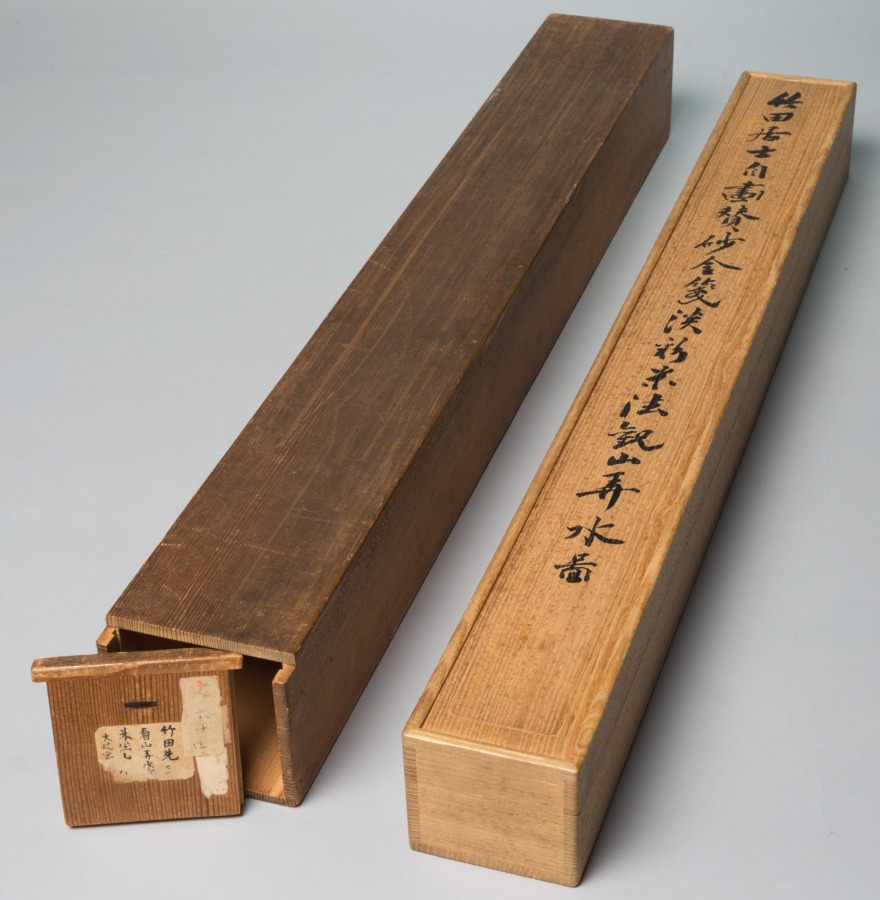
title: Mountain View and Blue Water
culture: Japan, Edo period (1615–1868)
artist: Tanomura Chikuden (Japanese, 1777–1835)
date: early 1800s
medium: hanging scroll; ink, color, and gold on paper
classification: Painting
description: Tanomura Chikuden was an eminent painter whose adopted son, Tanomura Chokunyū (1814–1907), was Seifū Yohei III’s painting teacher. This work was displayed at a gathering commemorating the 10th anniversary of Chokunyū’s death, something we know only because its custom-made box and archival documents have been carefully kept together. The box inscription also confirms that Chikuden was emulating the style of the Mi family of painters, active during China’s Southern Song dynasty (1127–1279). The painting’s Chinese-style silk wrapper is inscribed and sealed on its interior by members of Chokunyū’s community.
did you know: The mountain shapes are built up with multiple small wet strokes.